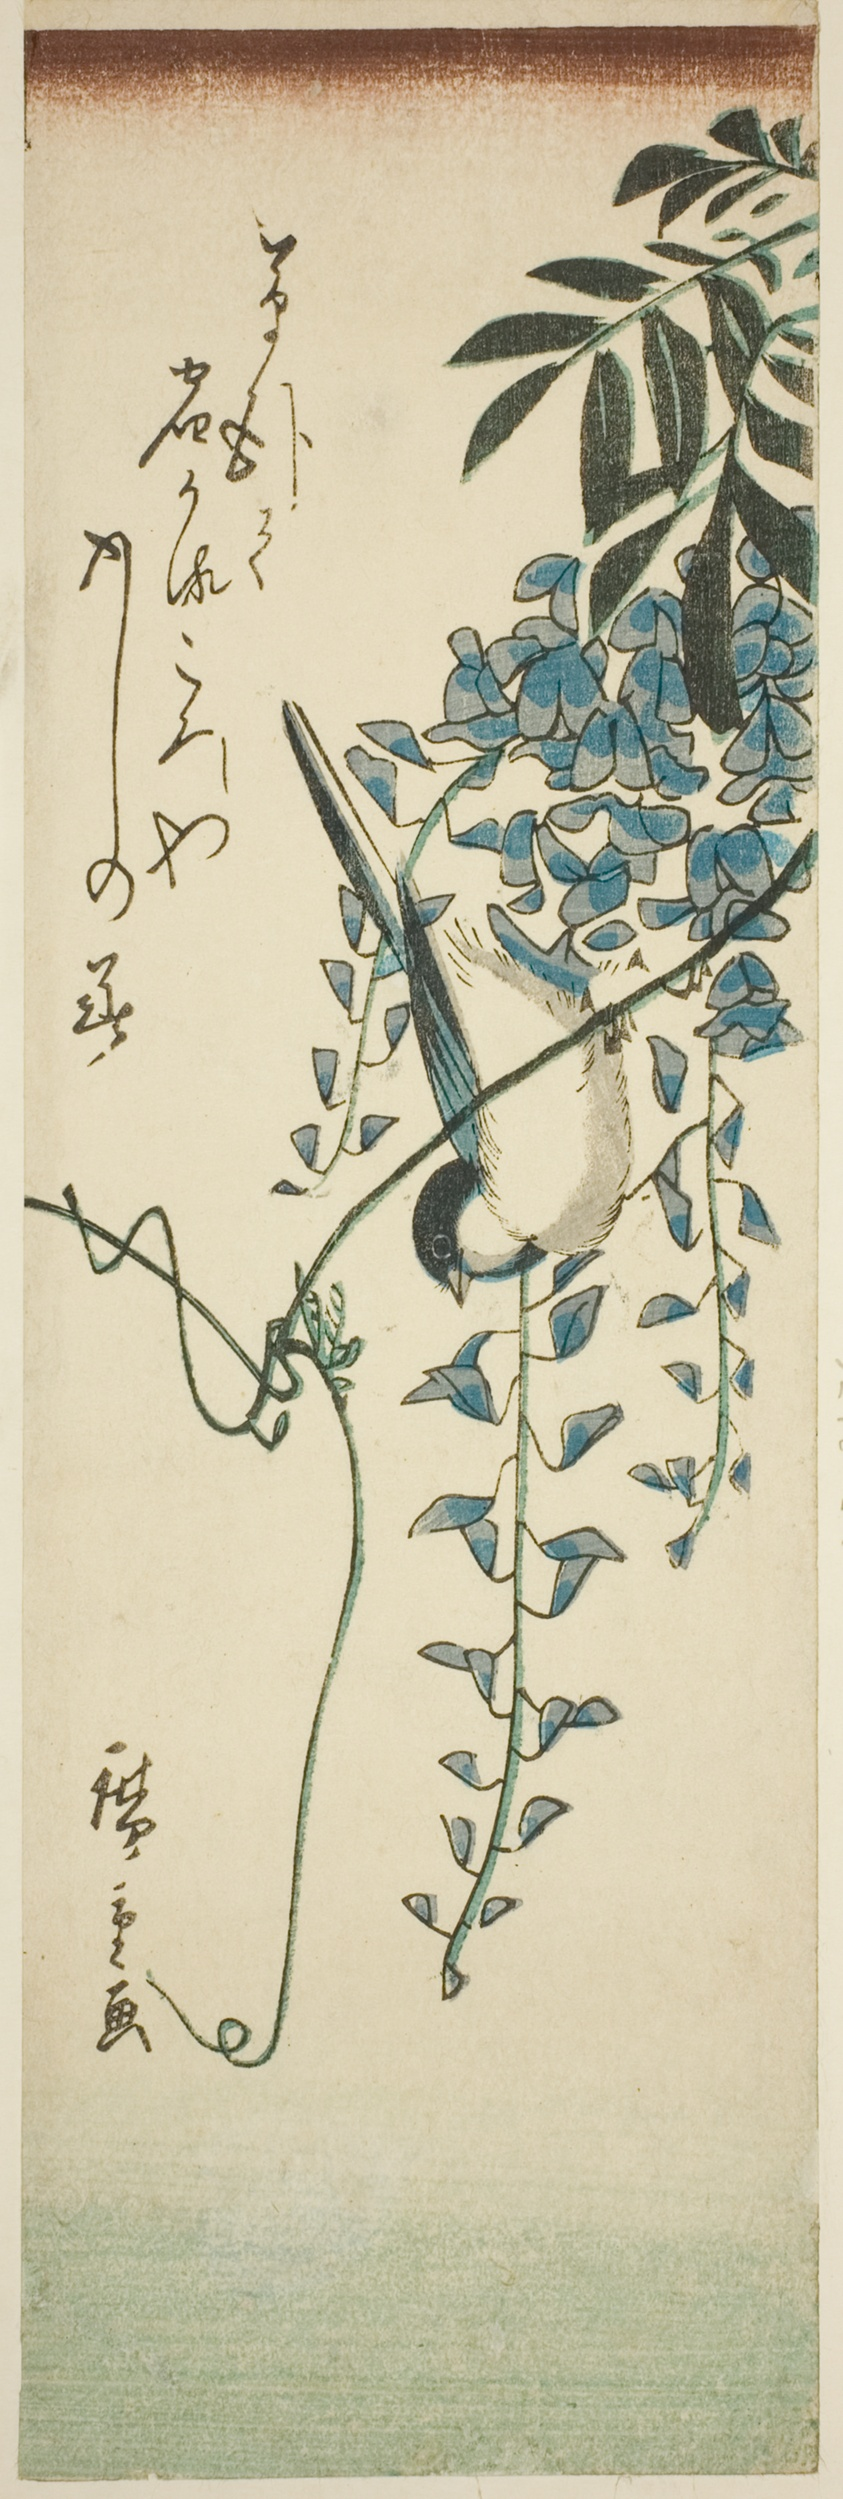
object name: Print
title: Bird and wisteria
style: Japanese (culture or style)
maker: Utagawa Hiroshige 歌川 広重; Japanese, 1797-1858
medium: Color woodblock print; aitanzaku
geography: Japan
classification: woodblock print; print; asian art